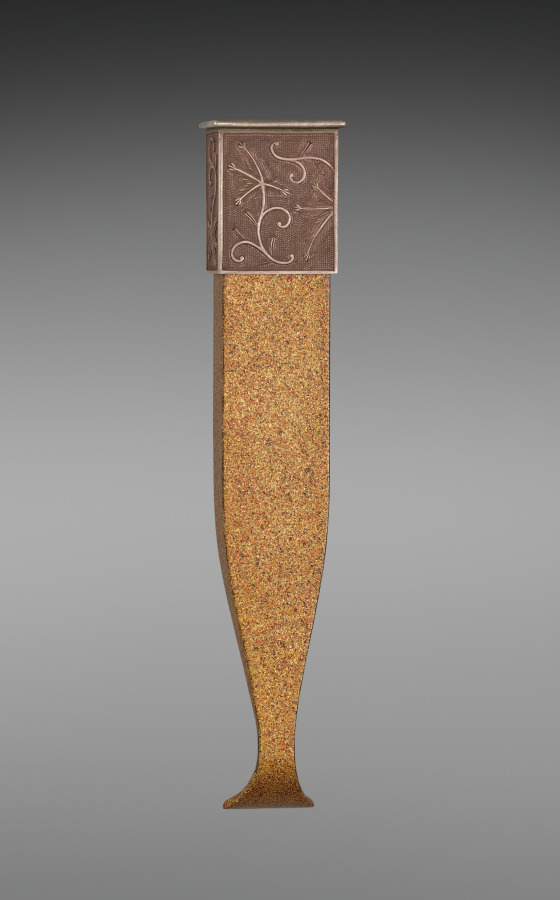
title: Writing Box (Suzuribako) with the “First Song” (Hatsune) Chapter from the Tale of Genji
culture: Japan, Meiji period (1868–1912)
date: early 1900s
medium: Lacquered wood with gold and silver sprinkled powder (maki-e), foil application (kirikane), and metal inlay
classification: Lacquer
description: The design of this box was inspired by an object in the 1639 lacquer wedding set of Chiyohime, the daughter of the shogun (ruler). Information about the set became available in the Meiji period, leading some lacquer artists to emulate its designs. This box features a scene from the chapter “First Song” (Hatsune) of the Tale of Genji, in which Prince Genji and his love Murasaki enjoy her garden. It incorporates the written characters for “first” (初, hatsu) and “sound” (音, ne), indicating the first song of the warbler in spring, associated with the new year—the water dropper for mixing the ink is in the shape of this bird.